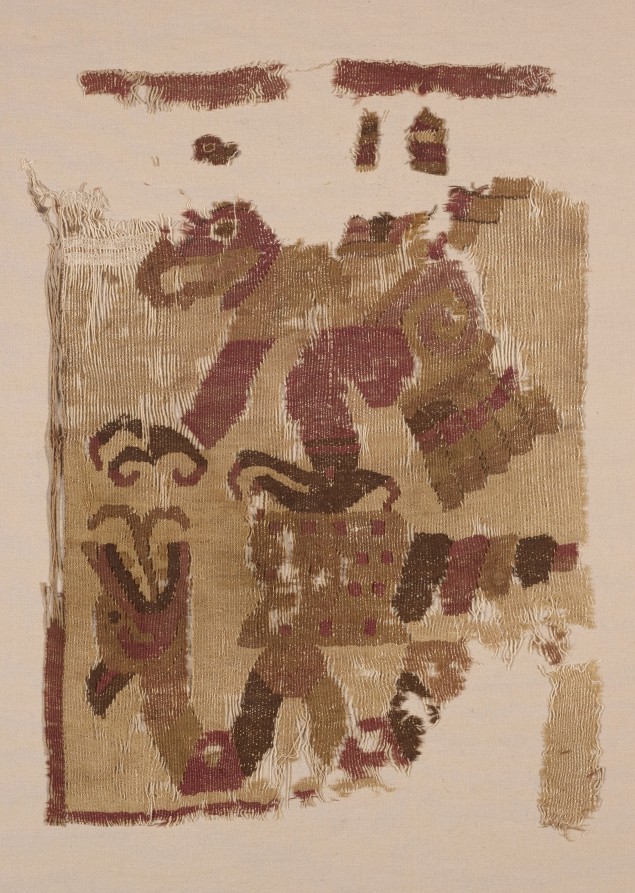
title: Textile Fragment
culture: Peru, Moche, north coast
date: c. 50–650 CE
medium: cotton and camelid fiber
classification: Textile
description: This fragment, one of several in the collection, is a rare survivor of catastrophic rains that destroyed much of the Moche textile legacy and may have helped to bring about the decline of Moche culture. It depicts a serpent and a snail beneath a hovering raptorial bird—perhaps a snail kite, a type of hawk named after its favored food. The size of the motifs implies that the original textile was large; a mantle (a shawl-like garment) or a hanging are among the possibilities.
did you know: This fragment is a rare survivor of floods that destroyed much of the Moche textile record.